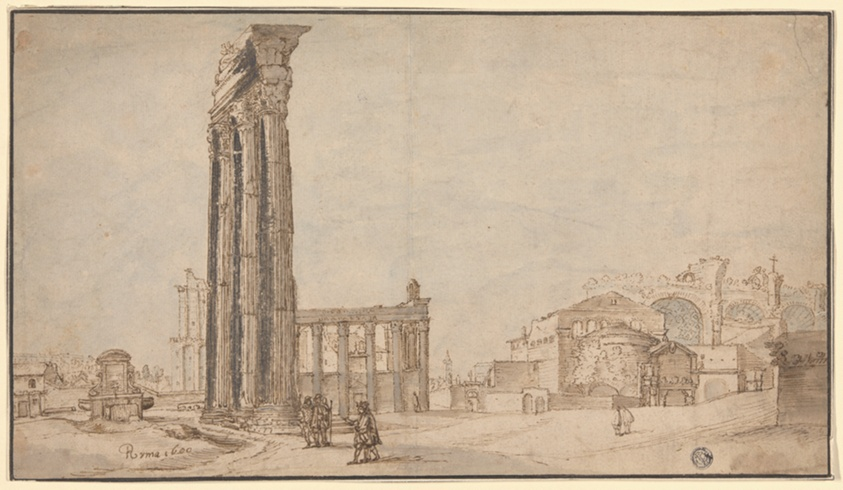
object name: Drawing and Watercolor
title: View from within the Roman Forum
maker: Circle of Willem van Nieulandt II; Flemish, c.1584-after 1635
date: 1600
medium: Pen and brown ink with brush and pale blue and brown wash, on ivory laid paper, laid down on ivory laid paper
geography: Flanders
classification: pen and ink drawings; drawings (visual works); prints and drawing; brush and wash; paper